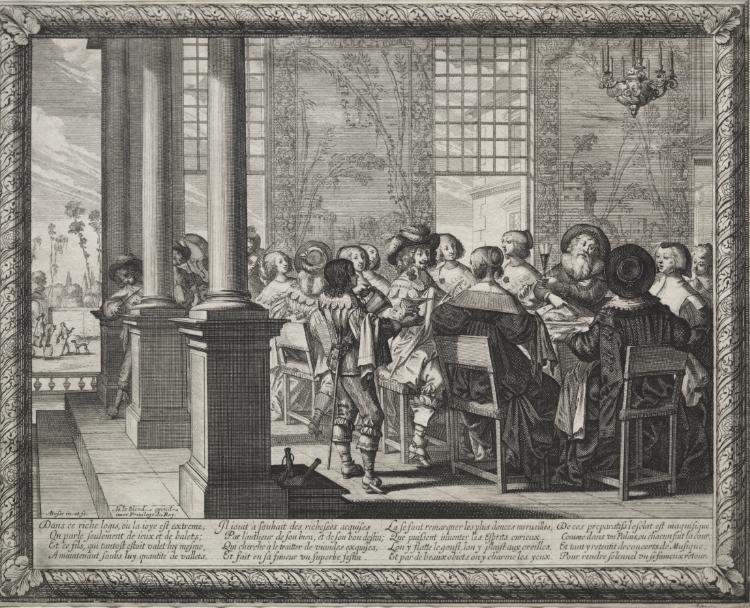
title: The Prodigal Son: The Feast in Honor of the Prodigal's Return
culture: France, 17th century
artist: Abraham Bosse (French, 1602–1676)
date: 1635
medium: etching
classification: Print